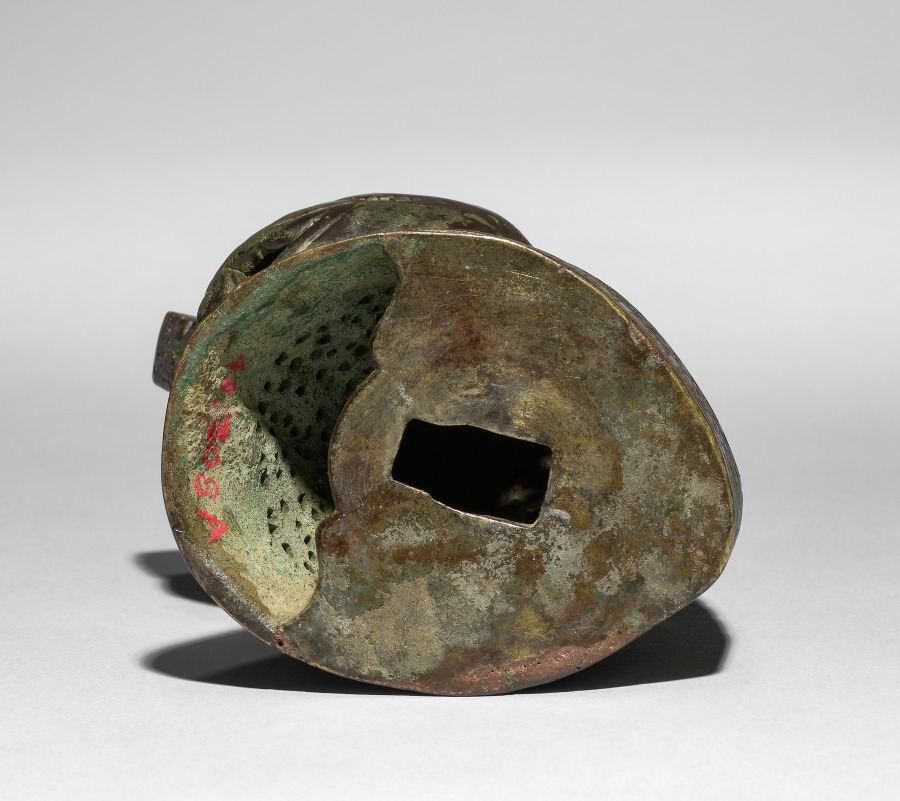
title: Head for a Feline Incense Burner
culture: Iran, Khurasan, Seljuq period of Iran (1037–1194)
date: 1150–1200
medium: Copper alloy, cast, engraved, chased, and pierced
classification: Metalwork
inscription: Qur'an sura al-jum'ah (The Friday Congregation) 62:9-10 (on neck and spine)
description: In Iran during the 1000s and 1100s, vessels in the shape of animals gained popularity, especially as incense burners. Felines were favored in Persian art and this piece may represent a caracal, a type of lynx. The head of the creature was cast separately and is removable to fill its body with hot coals and incense. Qur’anic verses on the neck and spine remind worshippers to set work aside, attend prayer, and then disperse to seek God’s bounty. The diffusion of perfumed smoke through the burner’s pierced palmette design may have served as a sensorial reminder of this teaching.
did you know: The head and body were each cast in halves that were soldered or welded together.